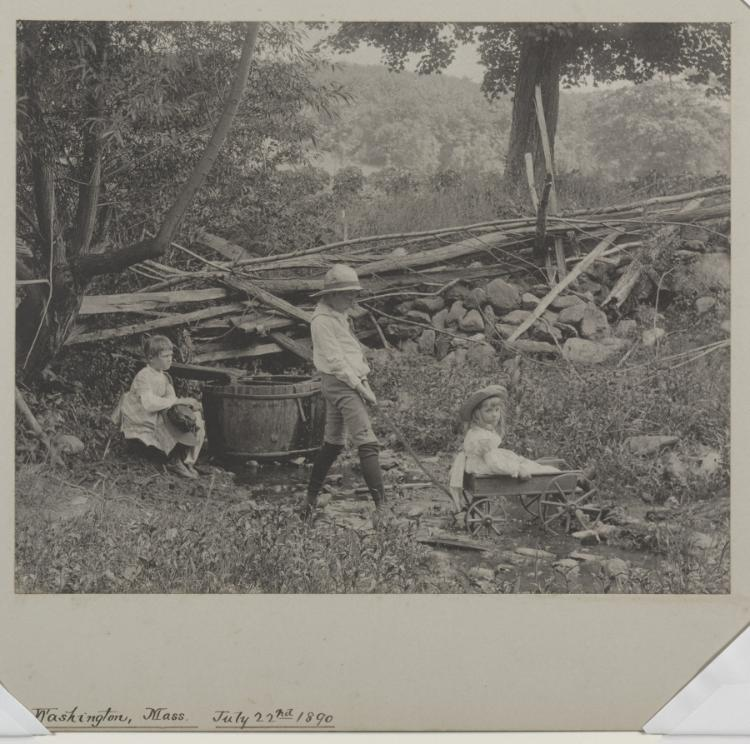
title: Mount Washington, Massachusetts, July 22, 1890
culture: America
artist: Robert Stuart Redfield (American, 1849–1923)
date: 1890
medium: platinum print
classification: Photograph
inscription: Written in ink on recto of mount: "R.S. Redfield [signed] / #1481 Mount Washington, Mass, July 22, 1890"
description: At the turn of the 20th century, Redfield was a leading proponent of staging simple genre scenes outdoors, instead of being limited to a studio setting. Here, the Philadelphia-born photographer carefully positioned three children in the foreground of this picturesque landscape dominated by a split-rail and stone fence. The print features his interests in clarity and fidelity and atmospheric effects. In this rural scene, he used the warm, delicate tonal range of a platinum print to render subtle variations and nuances of light. For two decades around 1900, Redfield was a leading advocate of photography as fine art and was one of the founders of the Photo-Secession. He sought to convince an audience accustomed to viewing photographs as simple recorded fact that they were beautiful images able to convey emotion.